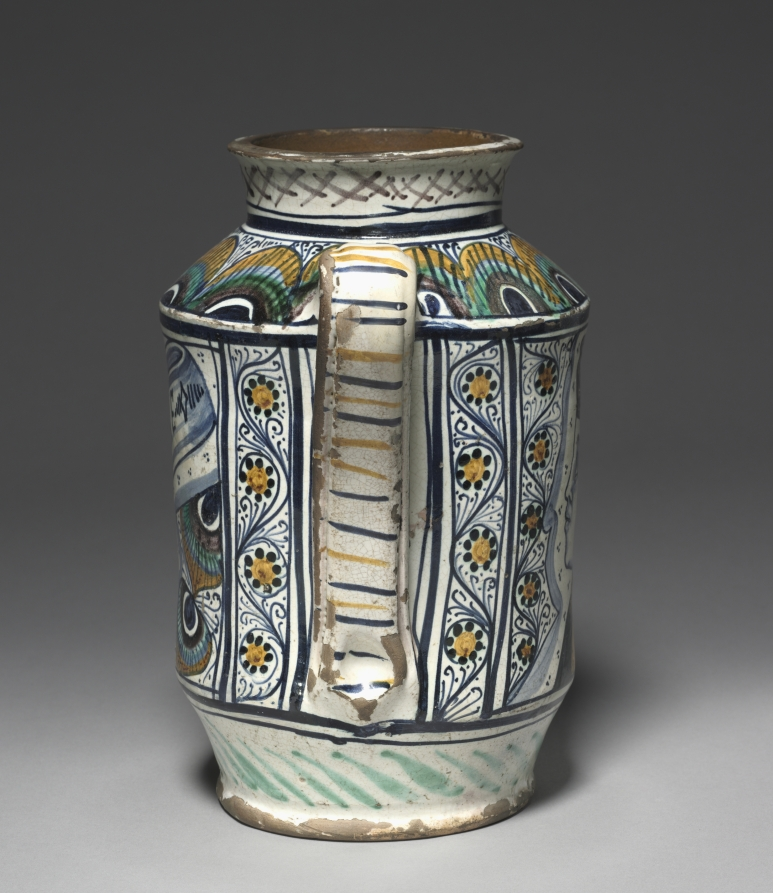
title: Pharmacy Jar (Albarello)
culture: Italy, Florentine region, Cafaggiolo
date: c. 1475–80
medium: tin-glazed earthenware (maiolica)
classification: Ceramic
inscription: in ribbon scroll on back: PENIAELFINE.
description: Storage jars that lined the shelves of Renaissance pharmacies often held medicinal herbs, spices, and ointments. Their shape made them easy to grasp while the flared lip allowed apothecaries to seal off the contents with parchment or cloth secured by a string. A scroll on the back of this vessel indicates that it may have once held a peony compound.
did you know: At various points in history, medicinal peony compounds have been prescribed for dizziness, weakness, hysteria, jaundice, and kidney stones.